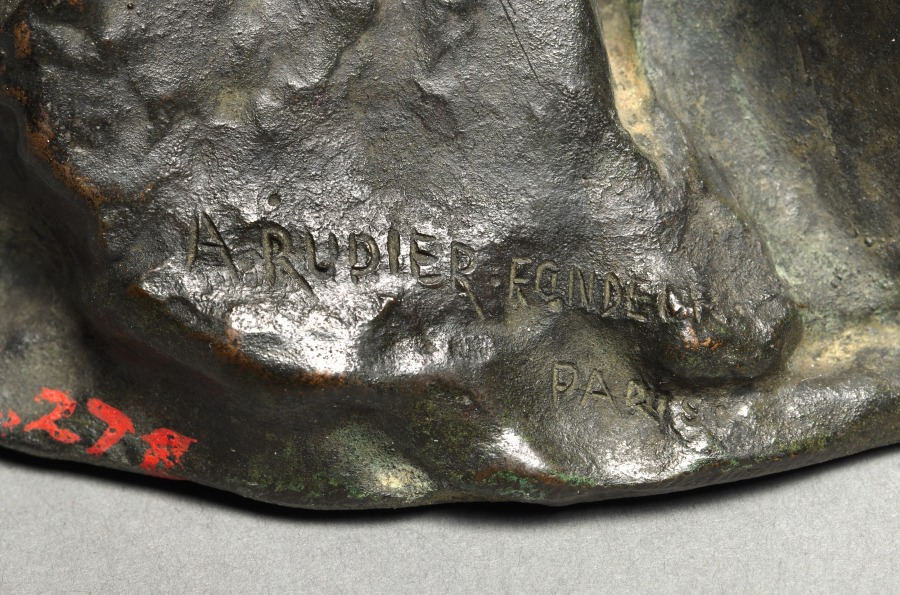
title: Les Damnées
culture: France, 19th century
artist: Auguste Rodin (French, 1840–1917)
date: 1885–1895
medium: bronze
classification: Sculpture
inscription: Signed front bottom right: "A. Rodin"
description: Rodin derived this couple, whose twisted bodies are locked painfully together, from the naked figures writhing in agony in his monumental sculpture The Gates of Hell.